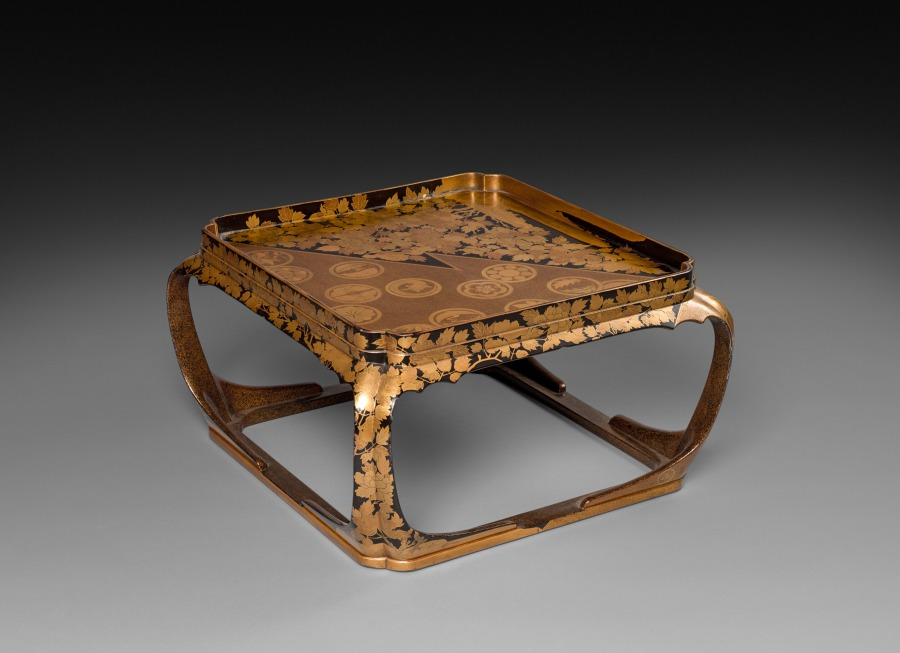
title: Table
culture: Japan, Meiji period (1868–1912)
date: 1868–1912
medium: lacquer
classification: Lacquer